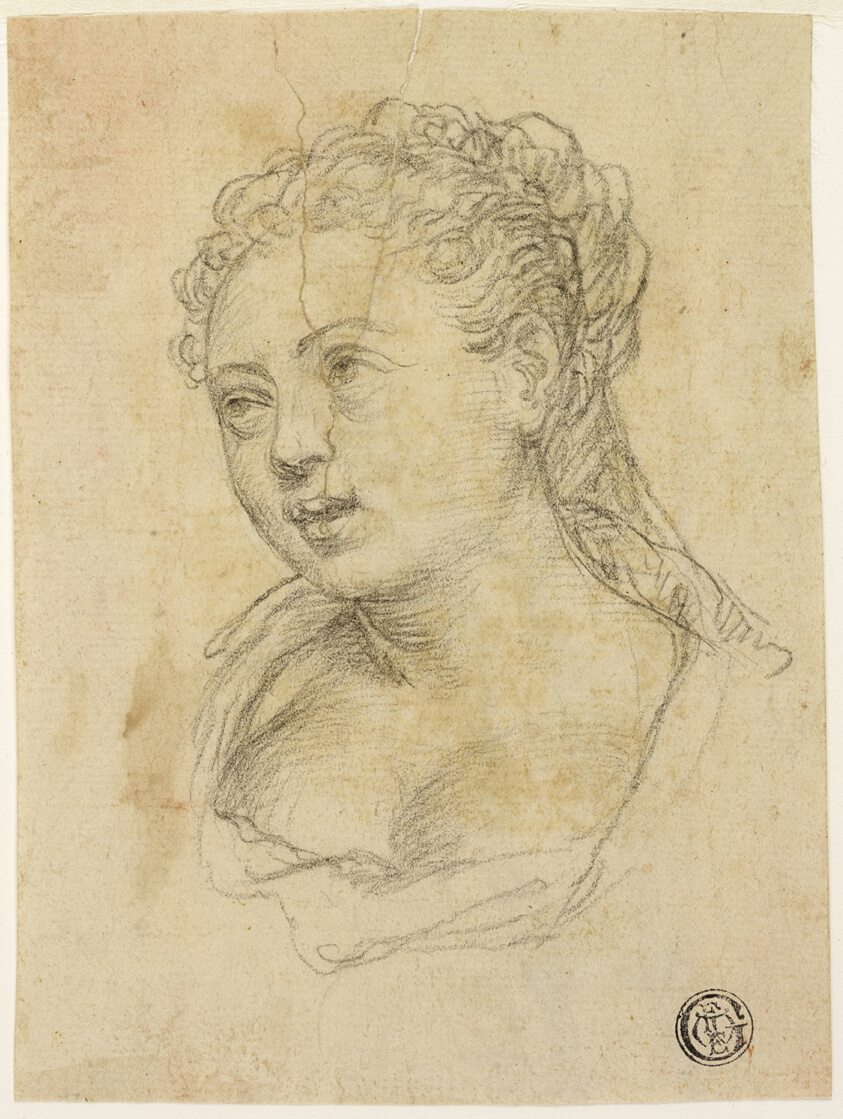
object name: Drawing and Watercolor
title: Woman's Head (recto); Sketch of Arm and Hand (verso)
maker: Follower of Paolo Veronese (Italian, 1528-1588)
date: 1590/96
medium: Black chalk (recto and verso) on cream laid paper, partially laid down on ivory laid paper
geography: Italy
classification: chalk; drawings (visual works); prints and drawing